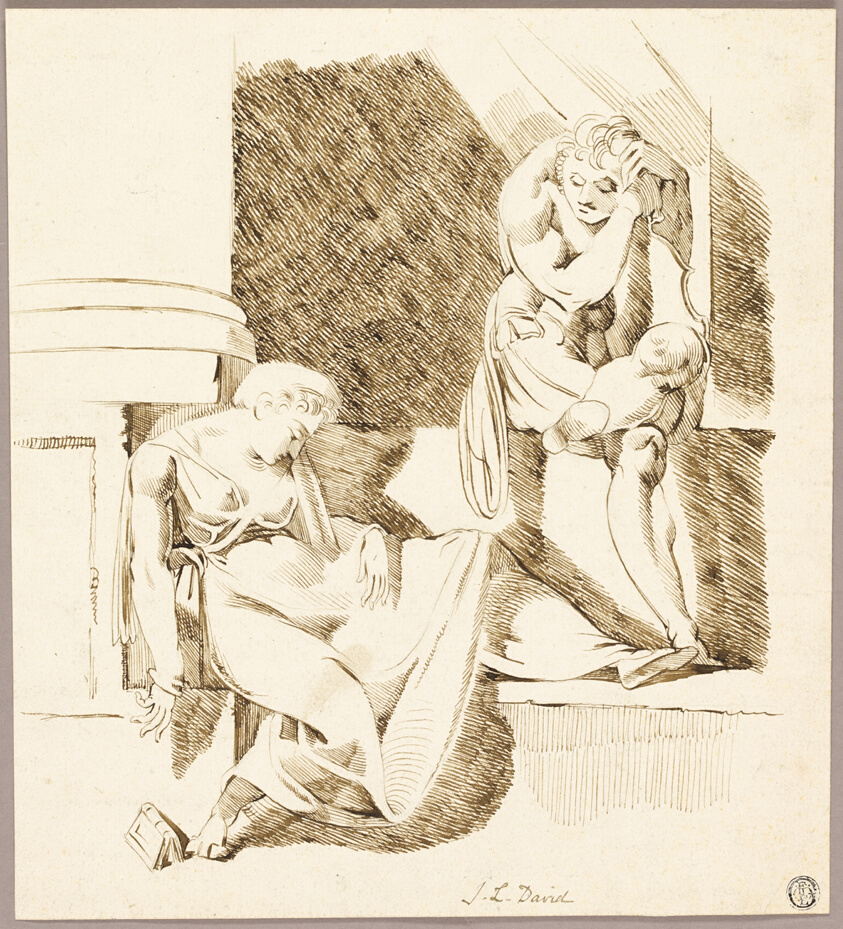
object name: Drawing and Watercolor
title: Seated Troubadour Looking at Woman Asleep on Ledge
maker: Unknown Artist; possibly after Henry Fuseli (Swiss, active in England, 1741-1825)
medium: Pen and brown ink, with traces of graphite on ivory laid paper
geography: Switzerland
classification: pen and ink drawings; drawings (visual works); prints and drawing; paper